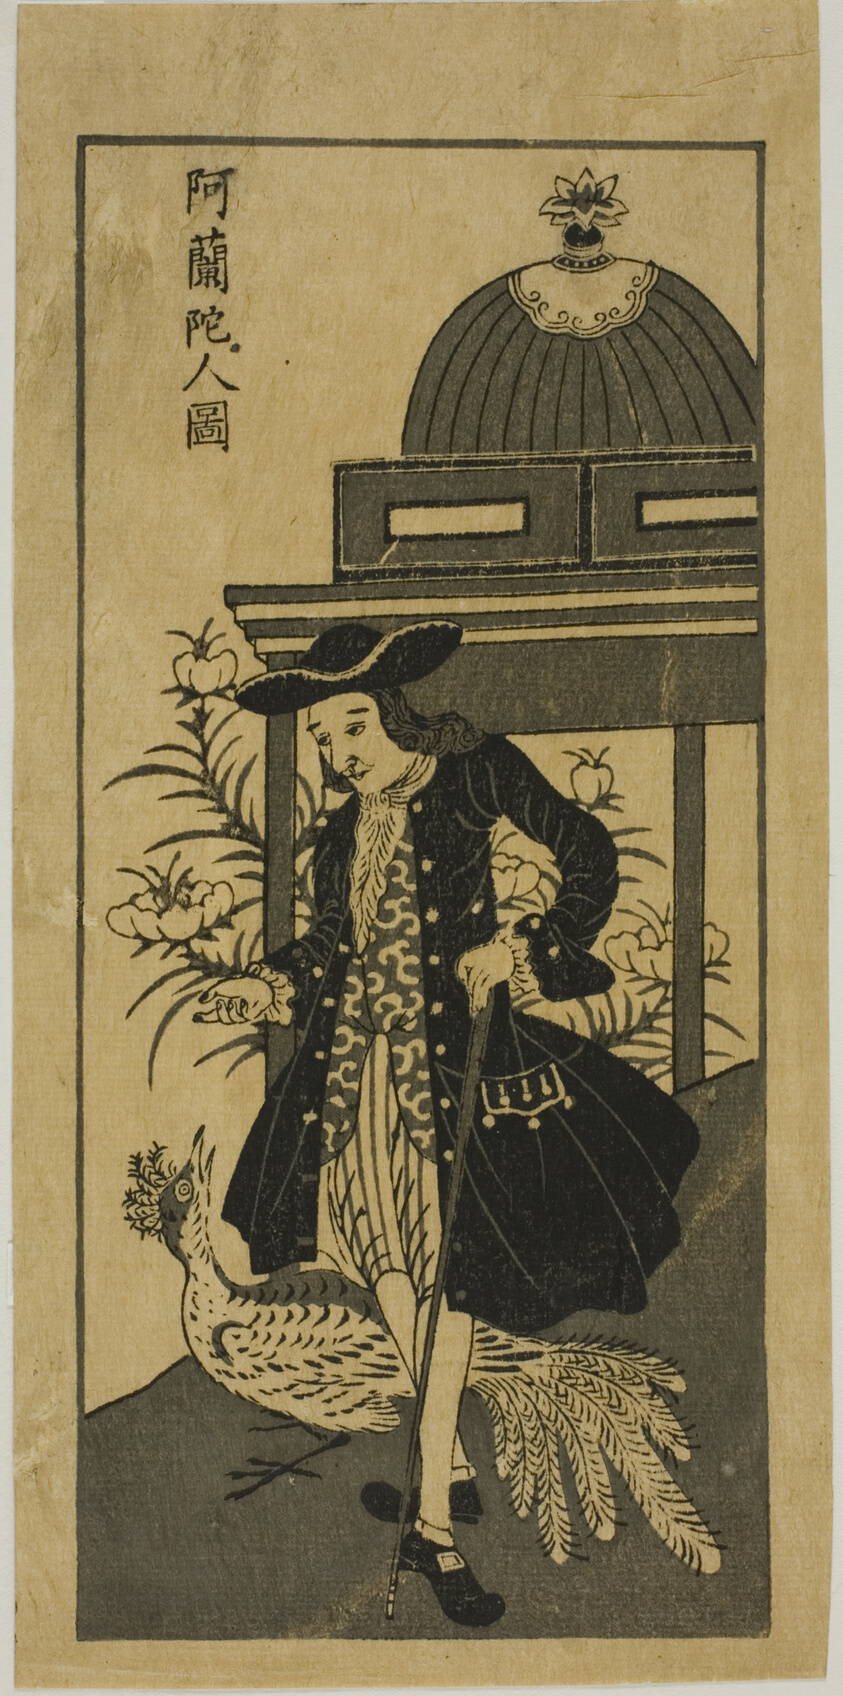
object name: Print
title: Picture of a Hollander with a Peacock 阿蘭陀人図 (Oranda jin zu)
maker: Unknown Artist (Japanese, date unknown)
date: late 18th century to mid 19th century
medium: Woodblock print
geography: Japan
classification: woodblock print; print; asian art